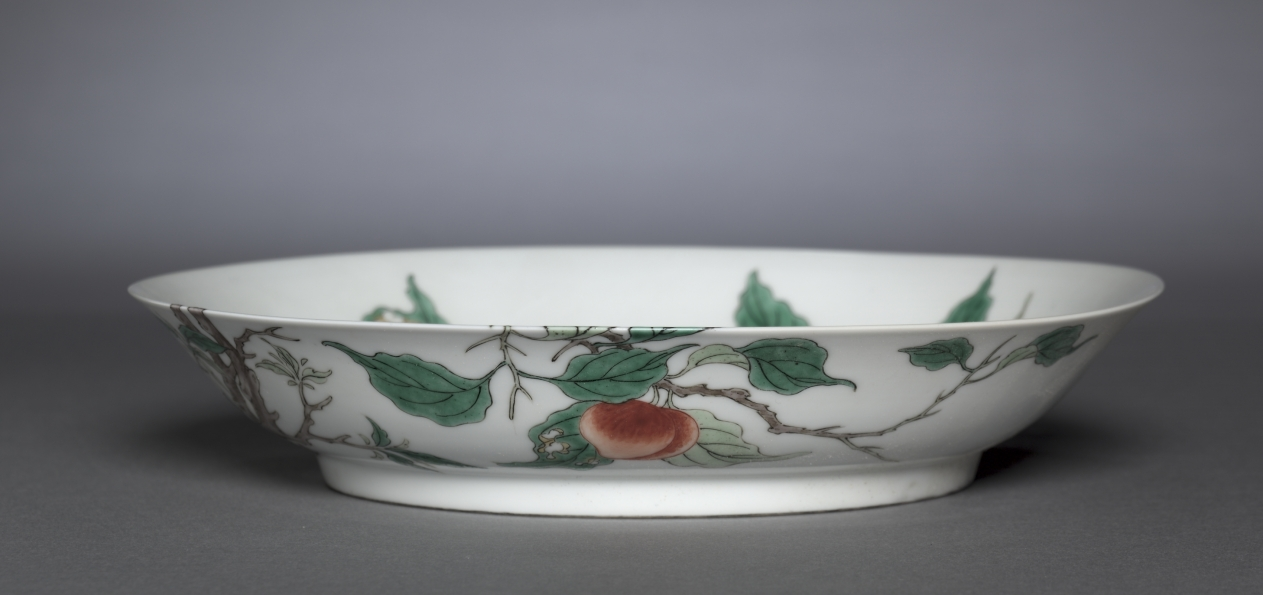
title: Dish with Bird on Fruit Tree Branch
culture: China, Jiangxi province, Jingdezhen kilns, Qing dynasty (1644–1911), Kangxi mark and reign (1662–1722)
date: 1662–1722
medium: Porcelain with famille-verte overglaze enamel decoration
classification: Ceramic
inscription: 大清康熙年制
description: Among the greatest achievements of early Qing porcelain are table wares and display objects decorated with polychrome painting like this pair of dishes. Featuring birds perched in peach trees, the dishes are related to the famous birthday set commissioned for the Kangxi emperor’s sixtieth birthday in 1713. These pieces are more inventive than those in the 1713 set, however, since the unframed ornament is allowed to continue unbroken from the outer to inner surfaces and back out again, thus transforming each vessel into a three-dimensional canvas.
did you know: By the early eighteenth century, the imperial kilns at Jingdezhen were producing exceptionally fine pieces on a staggering scale.